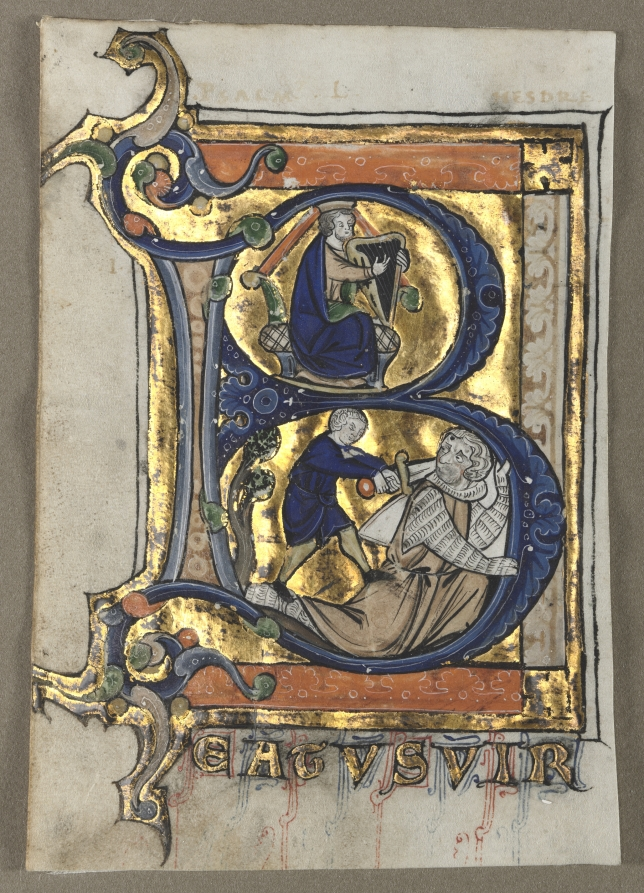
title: Leaf Excised from a Psalter: Initial B with King David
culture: Flanders, Liège(?), 13th century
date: c. 1260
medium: tempera and gold on vellum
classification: Manuscript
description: Traditional locations within the texts of manuscript psalters were marked by decorated initials or full-page miniatures. These miniatures designated the major divisions of the psalms as used in the daily office. The extraordinary quality of these miniatures suggests they once decorated a deluxe psalter made for a wealthy or aristocratic patron.